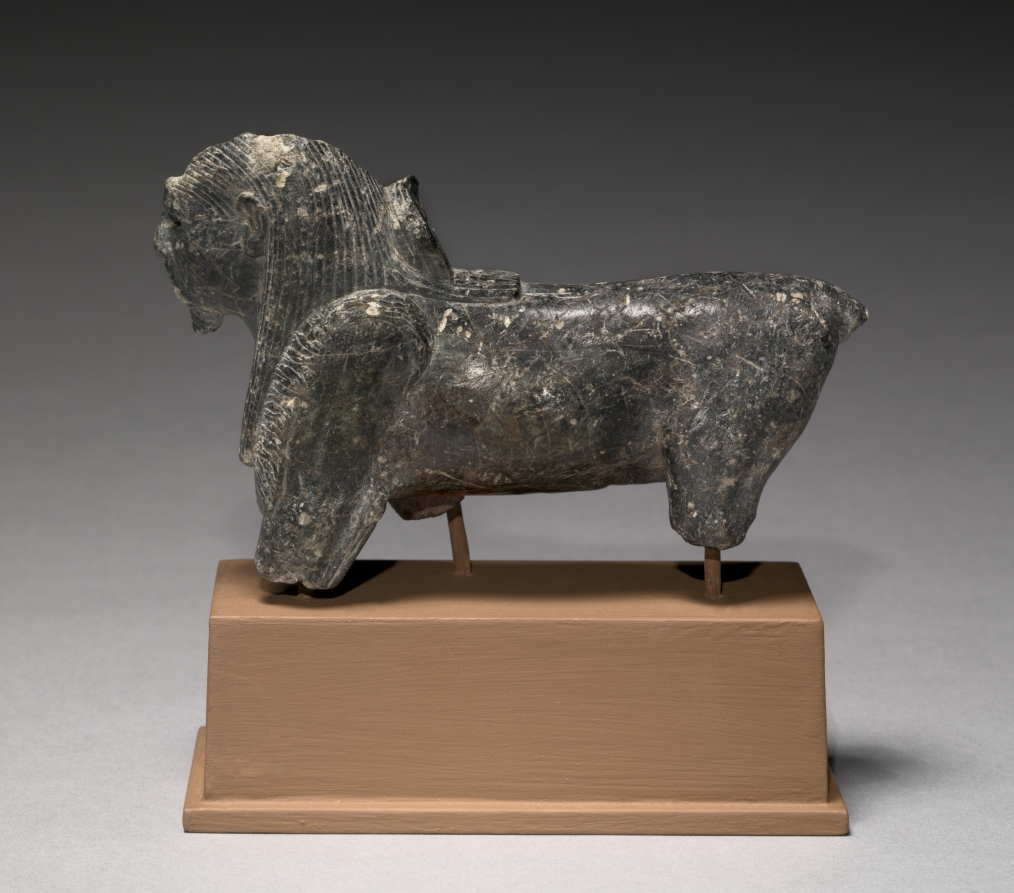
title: Tutu as Sphinx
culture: Egypt, Greco-Roman period (332 BCE–395 CE), Ptolemaic dynasty (305–30 BCE)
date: 150 BCE–30 CE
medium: gray steatite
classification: Sculpture